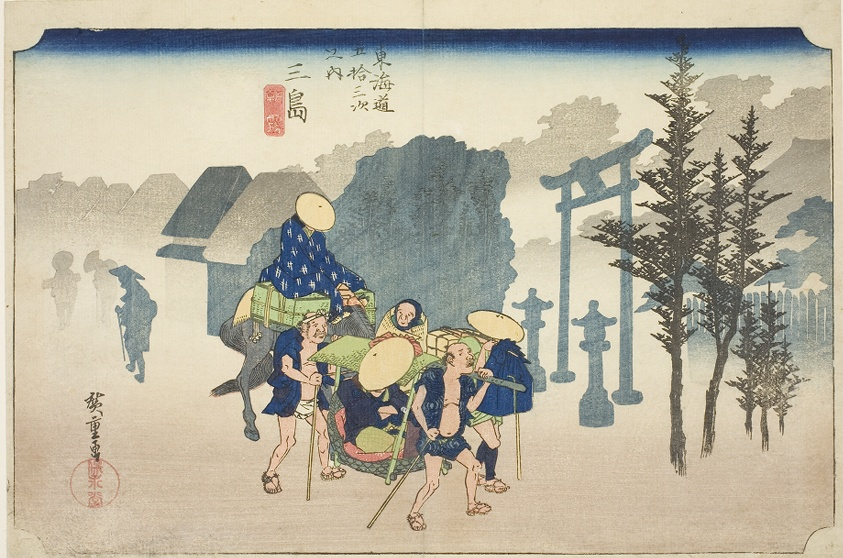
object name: Print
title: Mishima: Morning Mist (Mishima, asagiri), from the series "Fifty-three Stations of the Tokaido Road (Tokaido gojusan tsugi no uchi)," also known as the Hoeido Tokaido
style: Japanese (culture or style)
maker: Utagawa Hiroshige 歌川 広重; Japanese, 1797-1858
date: c. 1833/34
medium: Color woodblock print; oban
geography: Japan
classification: woodblock print; print; asian art